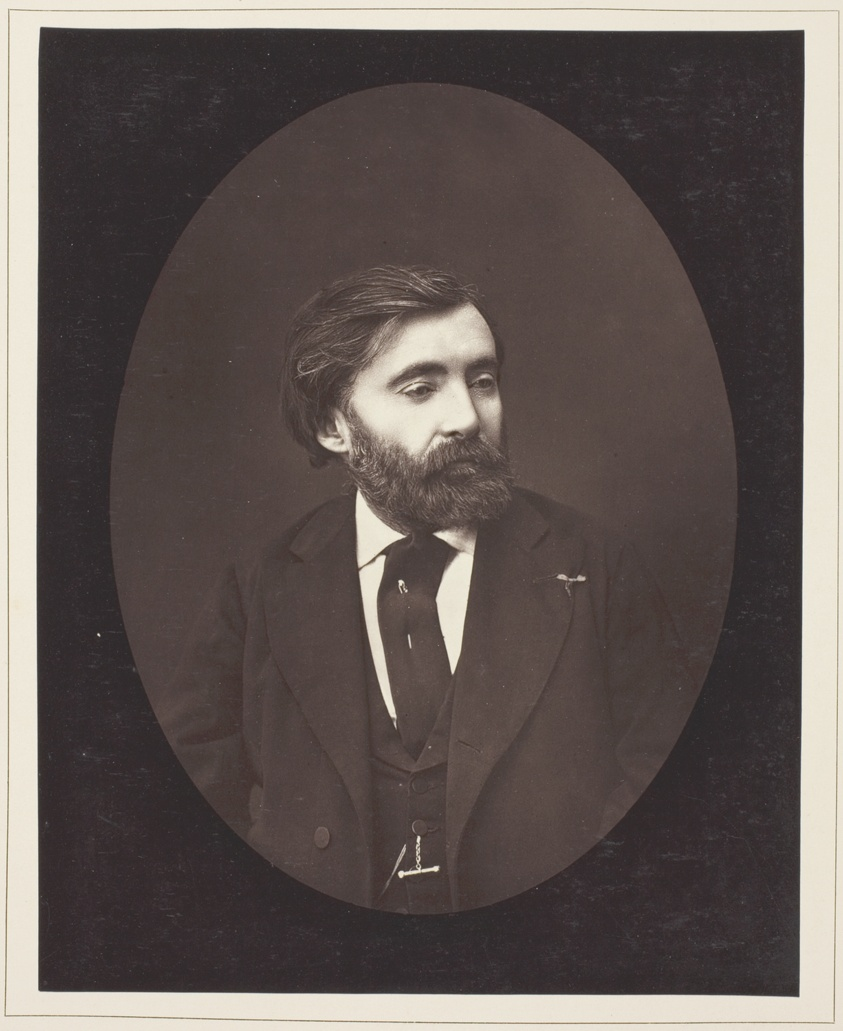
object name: Photograph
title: Henri, vicomte de Bornier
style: 19th century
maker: Ferdinand J. Mulnier (French, active 1860–1890)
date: c. 1876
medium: Woodburytype, from the periodical “Galerie Contemporaine Littéraire, Artistique” (1879), volume 8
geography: France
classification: woodburytype; photomechanical process; photography; photograph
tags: Collected by Hugh Edwards, Contemporaine Littéraire